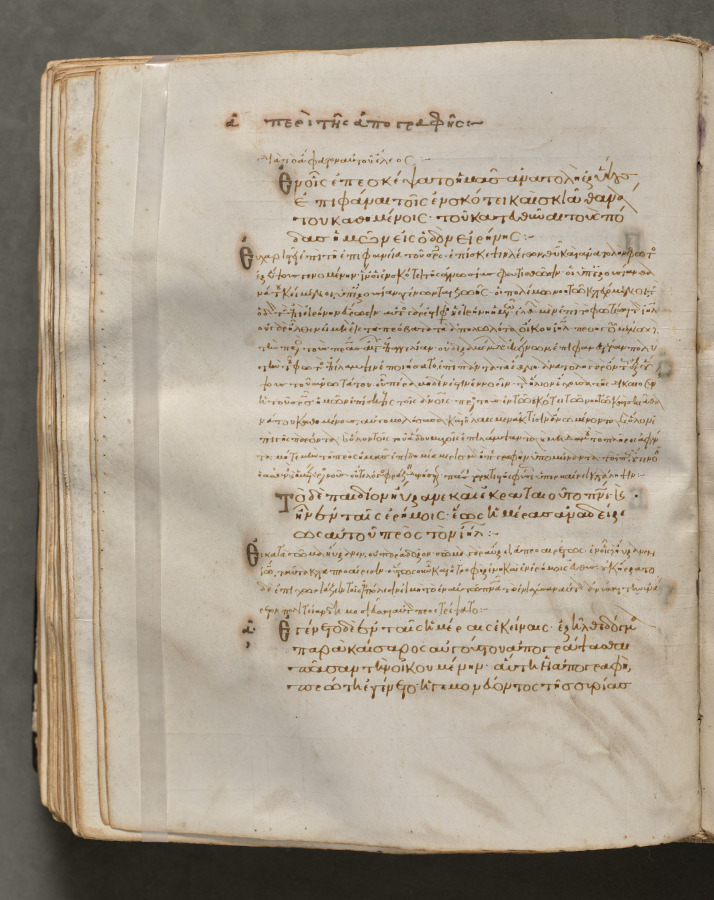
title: Text, folio 207 (verso), from a Gospel Book with Commentaries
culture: Byzantium, Constantinople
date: c. 1000–1100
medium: ink, tempera, and gold on vellum; leather binding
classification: Bound Volume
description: Each of the four gospels in this book opens on a page with brilliantly illuminated borders depicting the author of the text as well as birds-principally peacocks, symbols of the immortality of the soul-and fountains, representing the fountain of life and the salvation of the soul. This volume consists of 428 leaves with texts in Greek. Its level of sophistication suggests that it was probably written and decorated in a monastery in Constantinople.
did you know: Gospel Books were carried in procession through Byzantine churches.